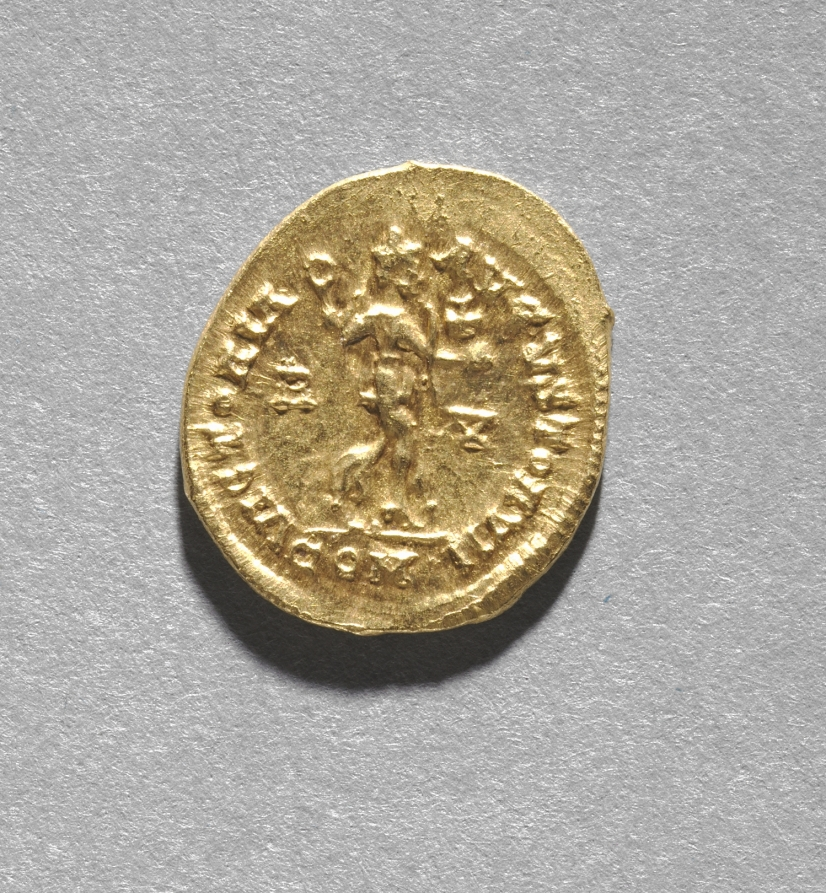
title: Solidus of Arkadios (reverse)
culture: Byzantium, Constantinople, Byzantine period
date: 395–408 CE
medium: gold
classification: Coins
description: The vast number of surviving Byzantine coins attests to the level of trade across the empire. Controlled and supervised by the emperor, the producers of coins took care to represent his authority and reflect his stature. Talented artists were recruited to engrave the dies (molds) used for the striking of coins. Emperors increasingly came to include their heirs and co-emperors on their coinage, as well as other family members or even earlier rulers. Coins were recognized, then as now, as small, portable works of art. With their inscriptions and images, Byzantine coins provide valuable documentation of historical events and a record of the physical appearance of the emperors. The coins shown here include the solidus, the basic gold coin of 24 karats; the tremissis, a gold coin of one-third the weight and value of the solidus; and the nomisma, which in the 10th century replaced the solidus as the standard gold coin.